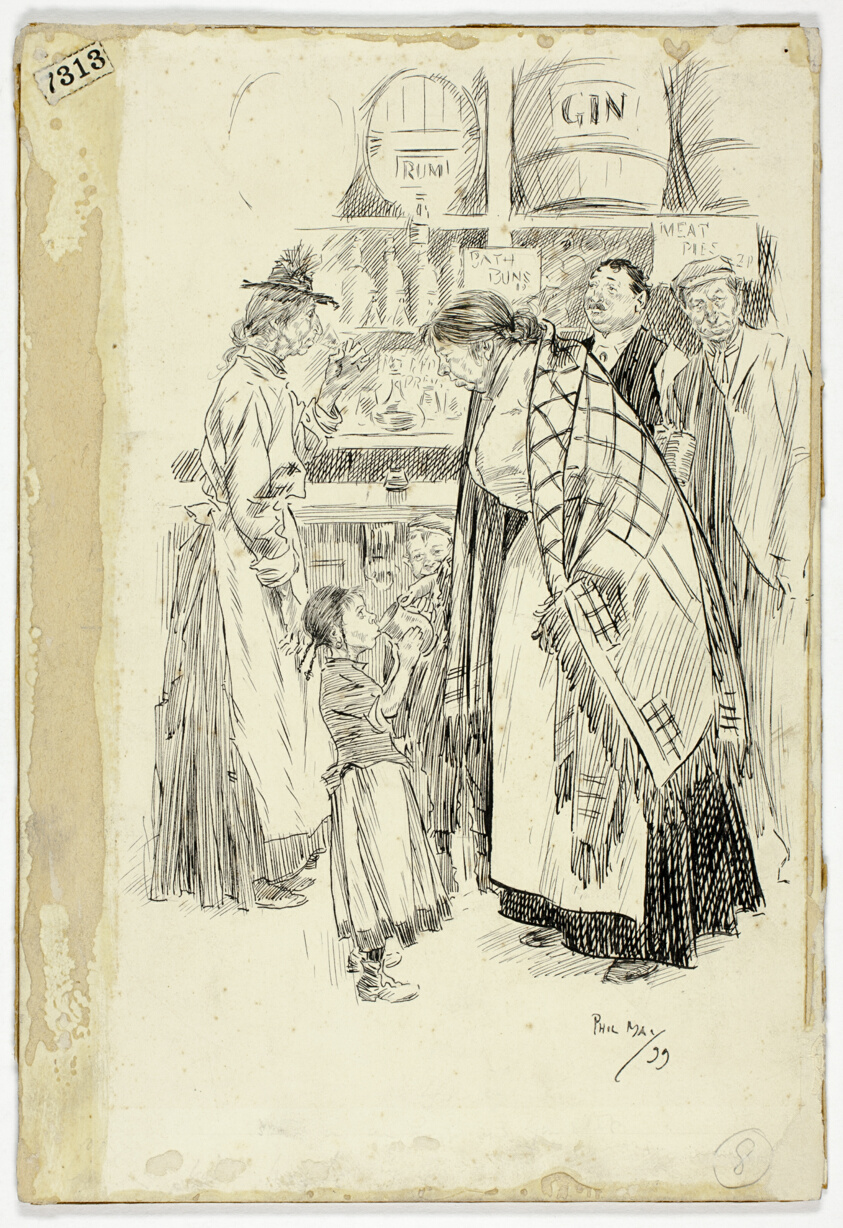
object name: Drawing and Watercolor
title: London East End: Sketch in an East End Gin Shop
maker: Philipp William May; English, 1864-1903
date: 1899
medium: Pen and black ink on ivory wove paper, laid down on board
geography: England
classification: pen and ink drawings; drawings (visual works); prints and drawing